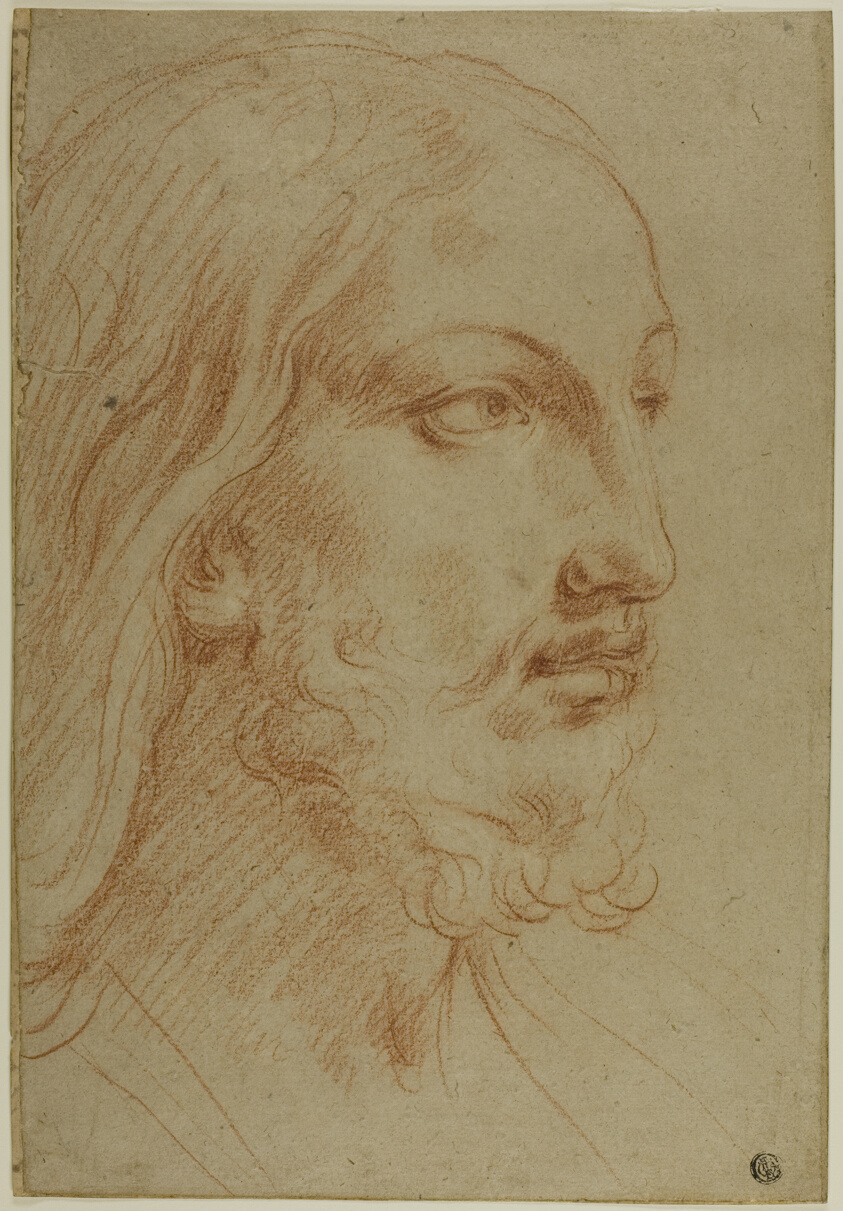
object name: Drawing and Watercolor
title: Head of Christ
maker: Giovanni Andrea Sirani (Italian, 1610-1670)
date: c. 1655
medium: Red chalk on tan laid paper, laid down on cream laid paper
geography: Italy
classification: chalk; drawings (visual works); prints and drawing